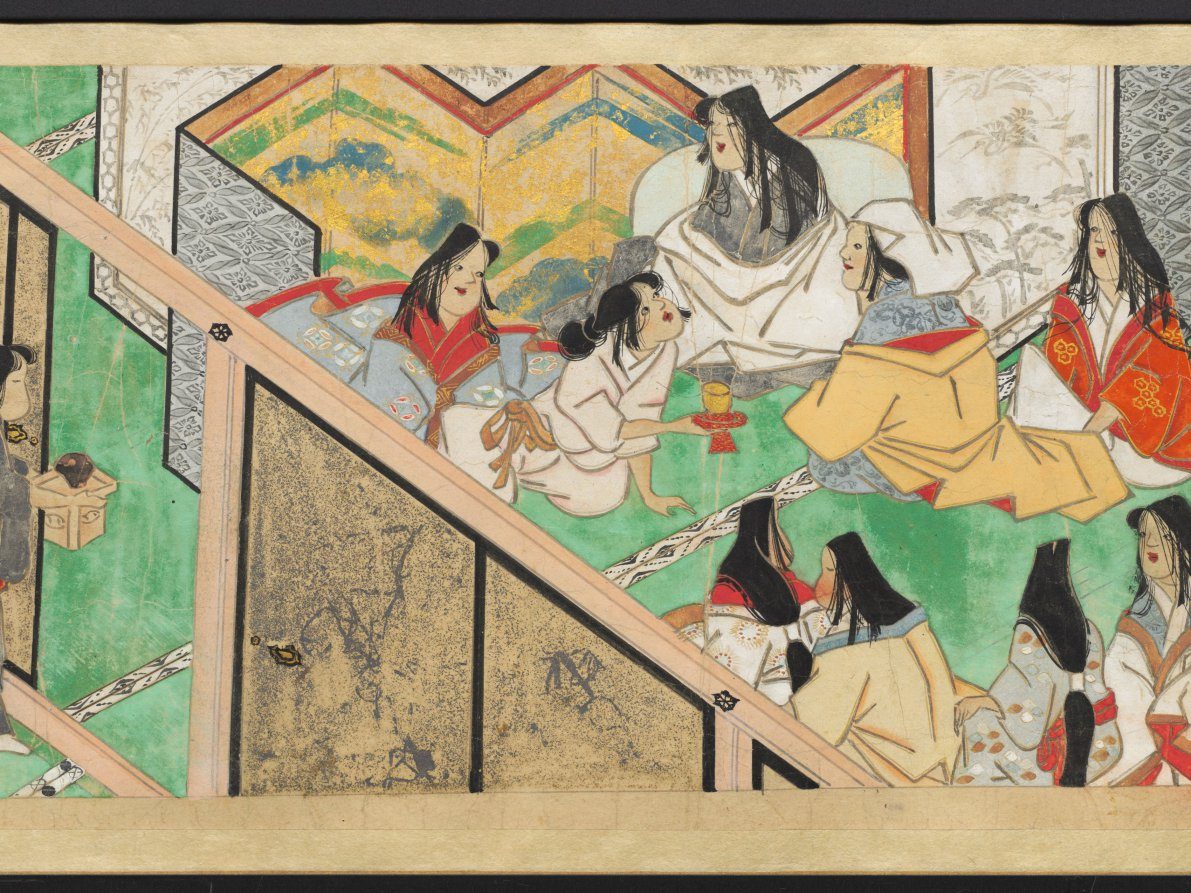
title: The Saltmaker's Story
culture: Japan, Edo period (1615–1868)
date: early 1600s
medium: One of a pair of handscrolls; ink, color, and gold on paper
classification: Painting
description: Once read and copied by girls at New Year’s celebrations and included in dowries, The Saltmaker’s Story is a rags-to-riches tale in which daughters are gifts from the gods. Despite his simple outlook, the main character progresses from humble roots as an associate at Kashima Shrine to the elite status of grandfather of the emperor through the intervention of the Kashima deity. The Saltmaker’s Story is traditionally presented in a set of three scrolls, but the text of this set has been removed by a previous owner, who remounted the illustrations as a pair. The paintings of this one take us from right to left through the first half of the tale.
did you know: This handscroll originally had texts before its paintings, but the texts were removed.